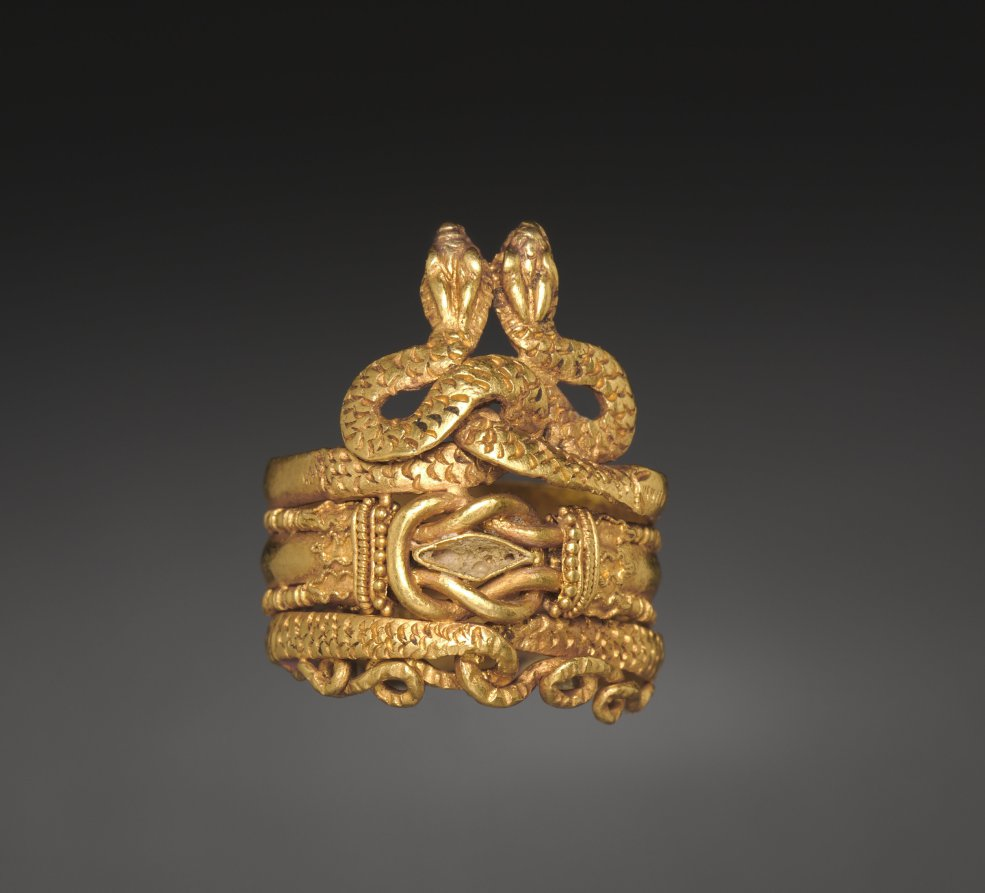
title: Ring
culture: Greece or Italy, Rome (?)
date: 1–100 CE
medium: gold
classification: Jewelry